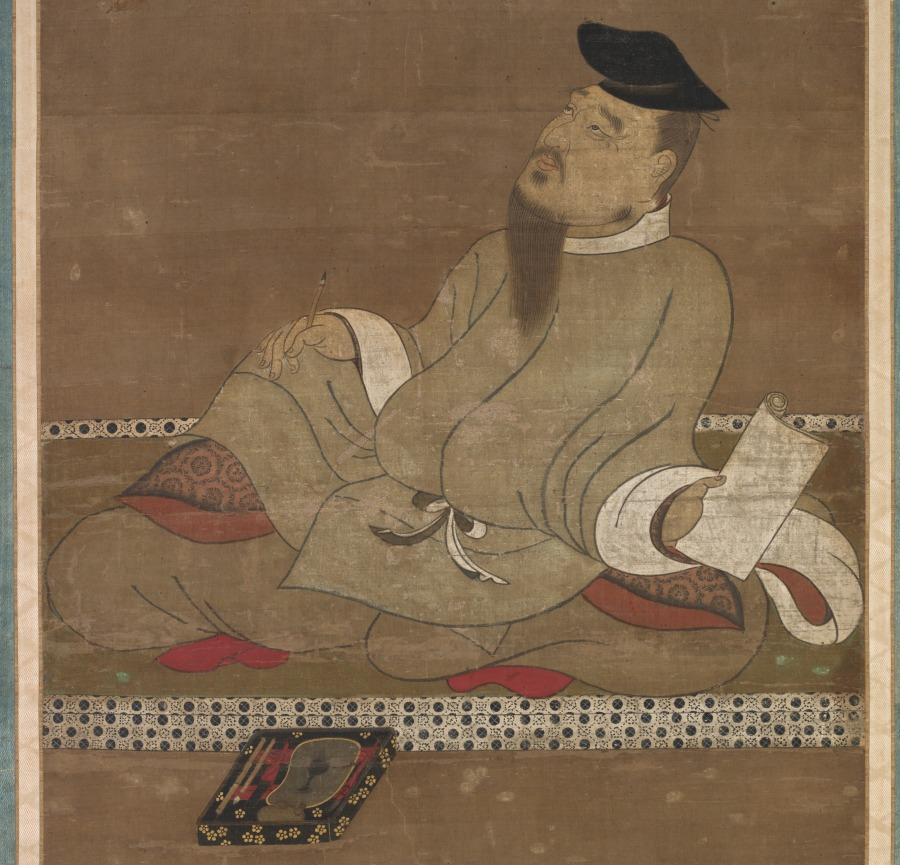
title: Kakinomoto no Hitomaro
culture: Japan, Kamakura period (1185–1333)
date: early 1300s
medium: hanging scroll; ink and color on silk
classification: Painting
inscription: 浦のあさ霧にしま隠れゆく舟をしぞ思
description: Among Japan’s greatest poets, Kakinomoto no Hitomaro’s (c. 660–724) portrait was often displayed at poetry competitions. Here, he gazes up at a falling cherry blossom, his writing box before him, brush and paper in his hands. A short biography and one of his poems are inked on painted rectangles meant to look like decorated papers. The first part of the poem has been mostly lost, but from what remains, it is possible to recognize it as Dimly, dimly in the morning mist that lies over Akashi Bay, my longings follow with the ship that vanishes behind the distant isle. —Translated by Robert H. Bower and Earl Roy Miner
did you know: The landscapes at the top and bottom of the painting depict Akashi Bay, with its famous pines along the shore, and a lone figure in a boat.